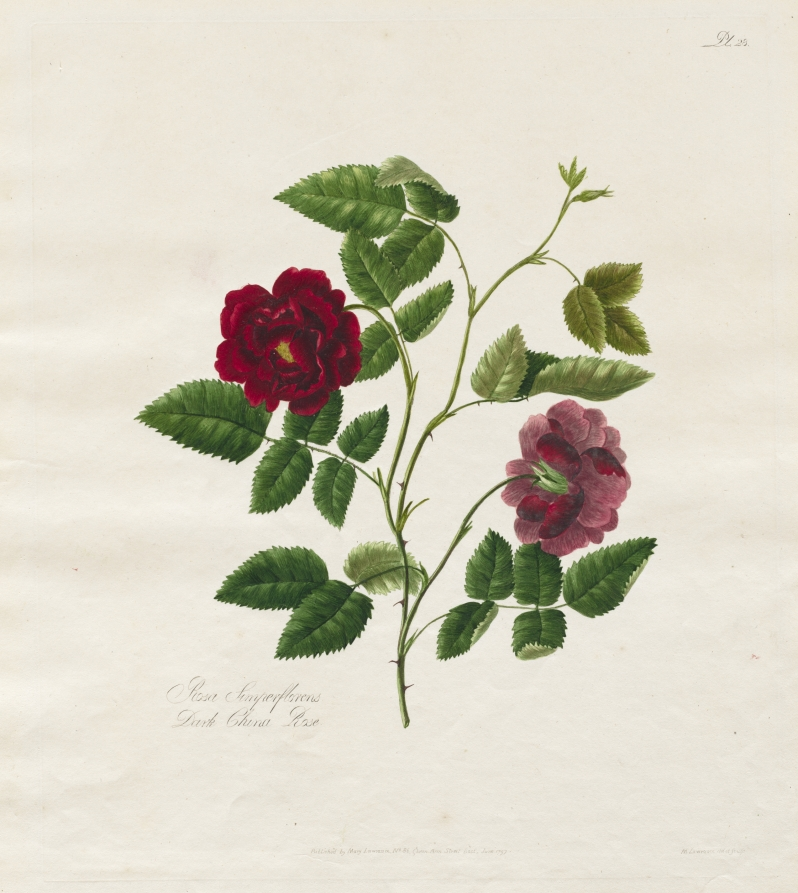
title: A Collection of Roses from Nature: Dark China Rose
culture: England, late 18th Century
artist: Mary Lawrance (British, 1781–1845)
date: 1799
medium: etching, hand colored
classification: Print